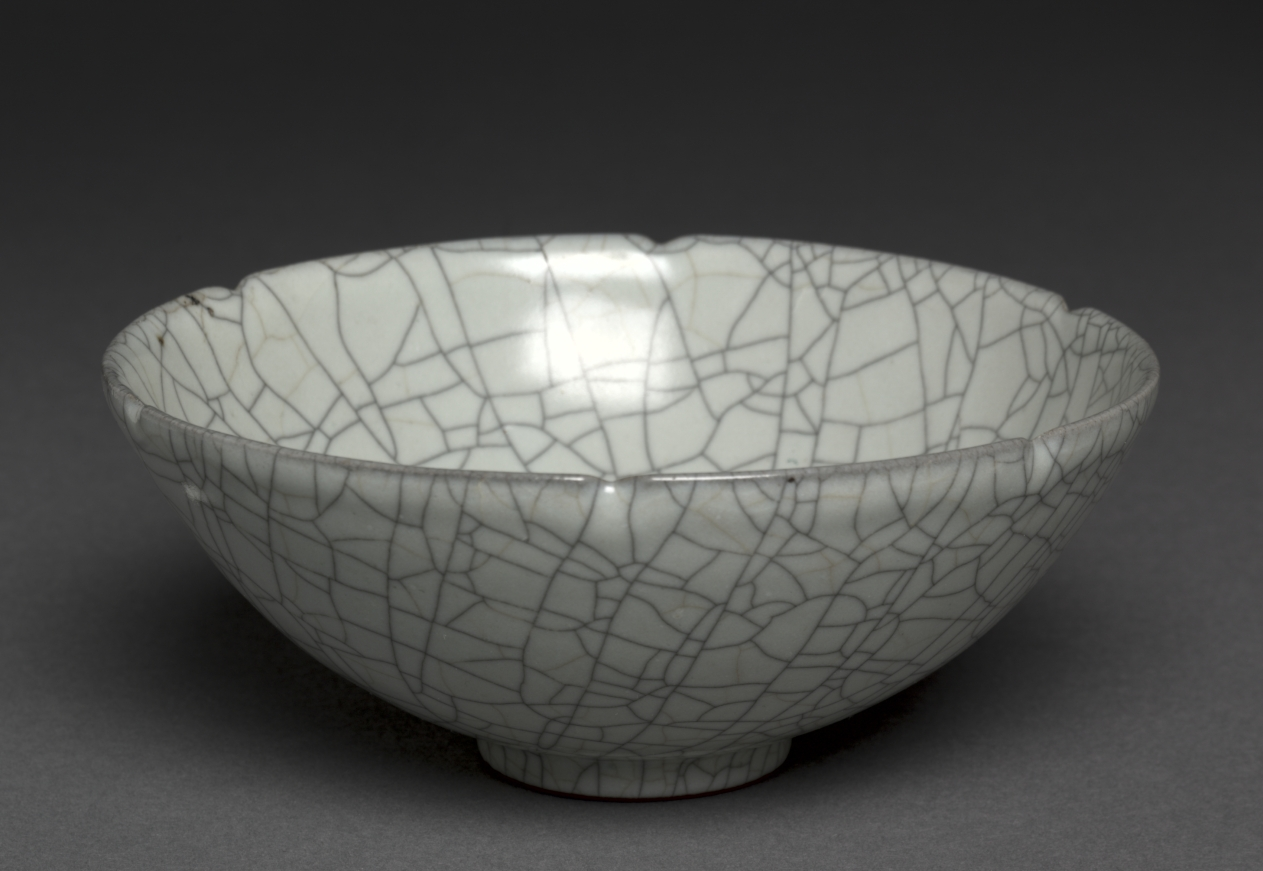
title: Sunflower Bowl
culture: China, Southern Song dynasty (1127-1279)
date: 1127–1279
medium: glazed reddish-brown porcelain, Guan ware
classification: Ceramic